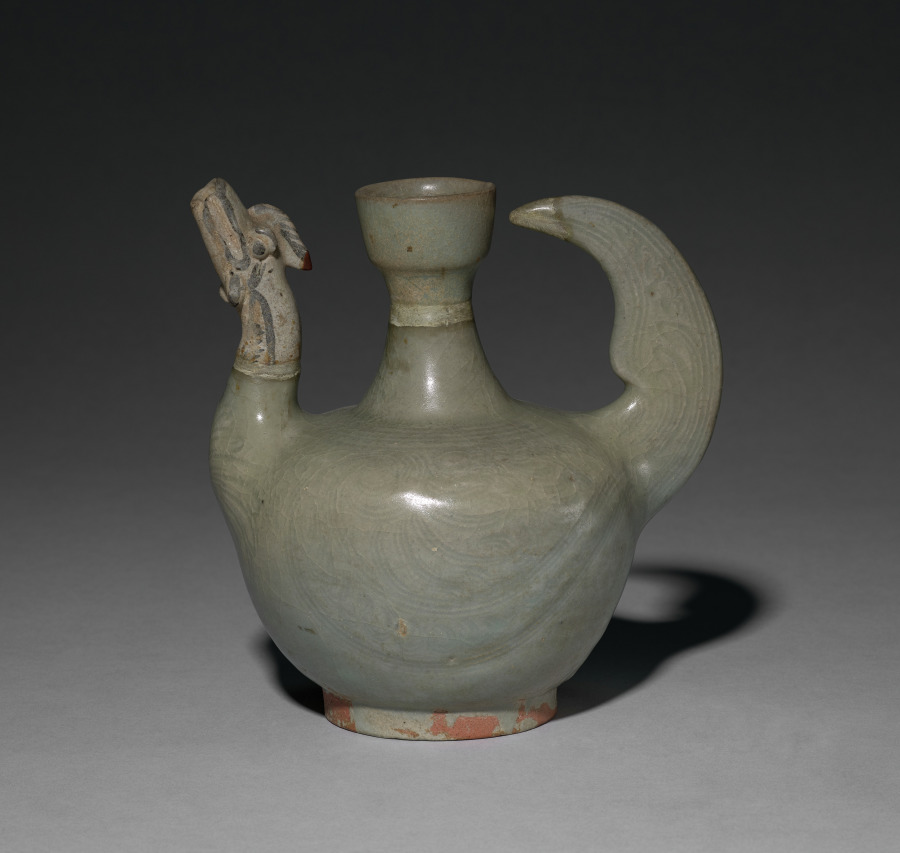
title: Pouring Vessel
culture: Siam, Sawankhalok ware, late 13th-14th Century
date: late 1200s-1300s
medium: stoneware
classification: Ceramic